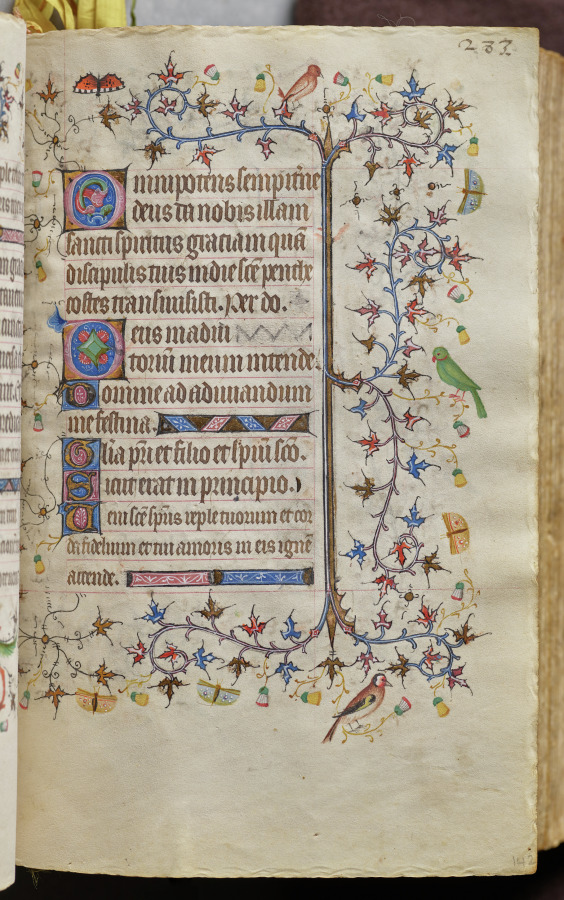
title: Hours of Charles the Noble, King of Navarre (1361-1425): fol. 142r, Text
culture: France, Paris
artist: Master of the Brussels Initials and Associates (French)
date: c. 1405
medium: ink, tempera, and gold on vellum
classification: Bound Volume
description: This precious volume was obviously highly prized by its owner, the French-born King of Navarre, who had his coat of arms painted on no less than twenty folios. Rather than directly commissioning this manuscript from a specific workshop, it seems that Charles the Noble acquired his book of hours -- perhaps ready-made for the luxury market -- while on a trip to Paris in 1404-05. A collaborative effort, six painting styles are evidenced within the pages of this codex, those of two Italians, two Frenchmen, and two Netherlanders. The painter who was responsible for the planning and decoration of the book, and who produced seventeen of the large miniatures, was a Bolognese artist known as the Master of the Brussels Initials. His principal assistant, responsible for most of the borders, was a Florentine who signed his name "Zecho" da Firenze on folio 208 verso.